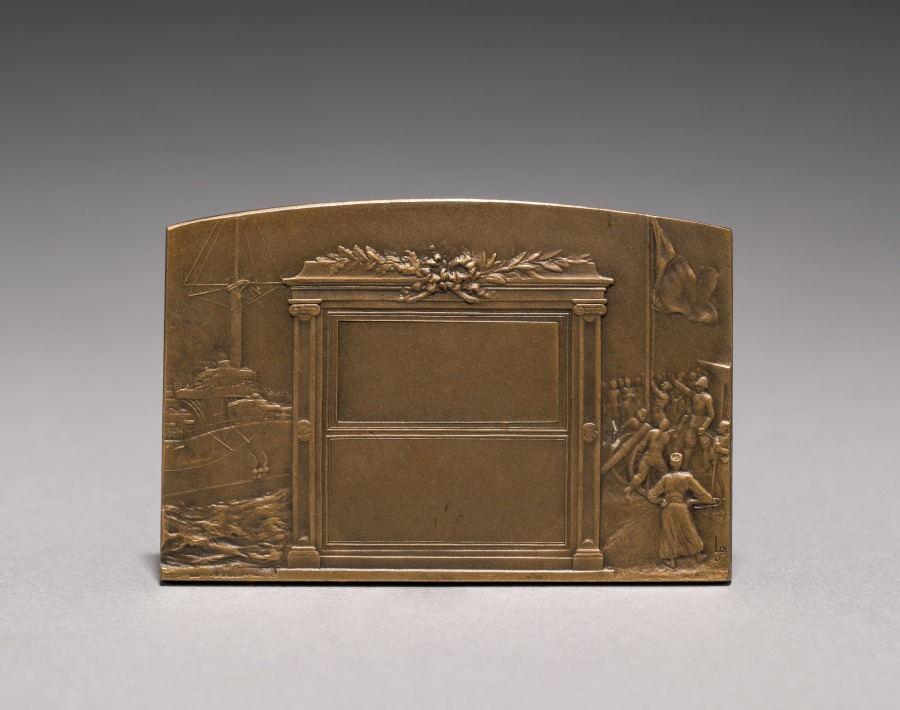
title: Medal (reverse)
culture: France, 19th century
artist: Jules Prosper Legastelois (French, 1855–1931)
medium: bronze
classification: Metalwork